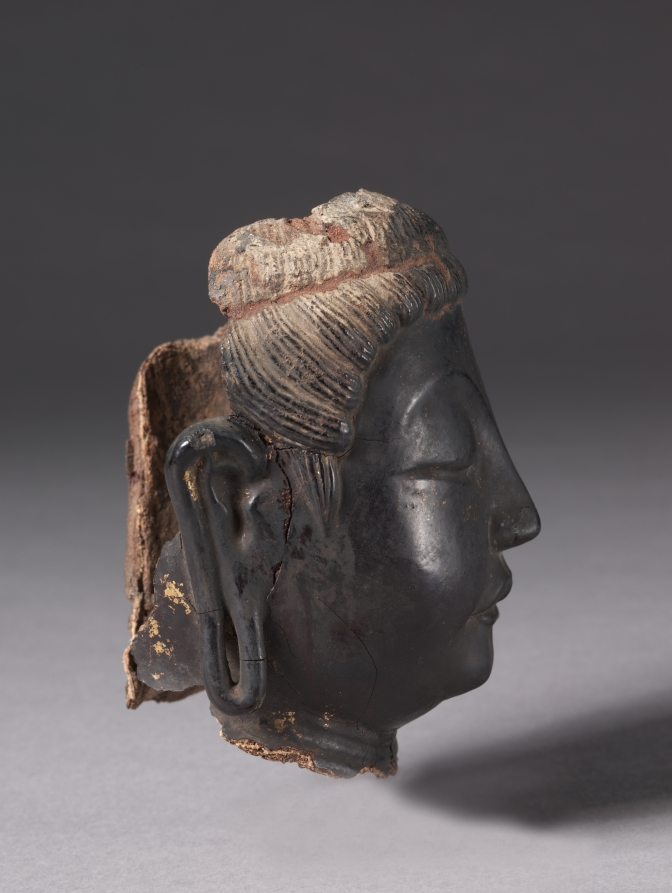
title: Head of Bodhisattva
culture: Japan, Nara period (710–94)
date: 700s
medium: dry lacquer with traces of gilding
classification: Sculpture